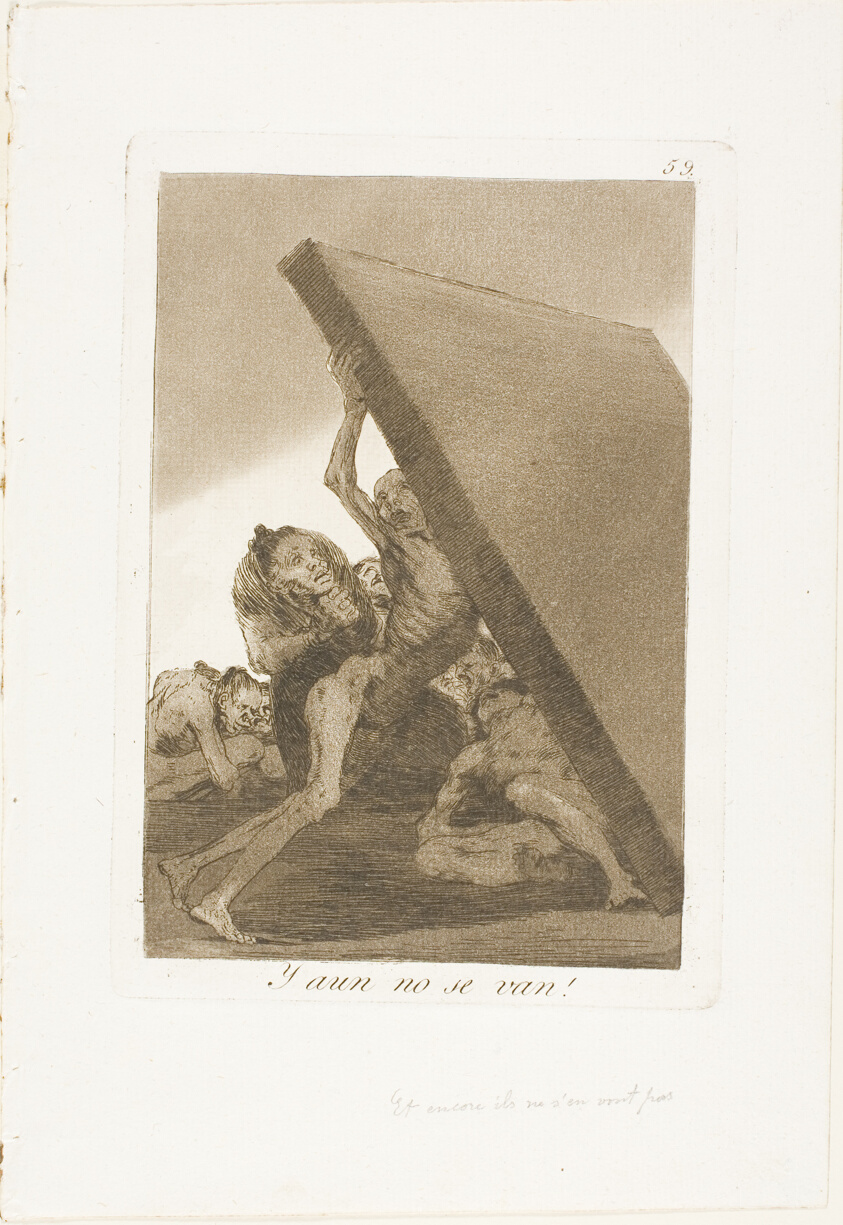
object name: Print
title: And Still They Don't Go!, plate 59 from Los Caprichos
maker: Francisco José de Goya y Lucientes (Spanish, 1746-1828)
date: 1797/99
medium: Etching and aquatint on ivory laid paper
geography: Spain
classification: etching; print; prints and drawing